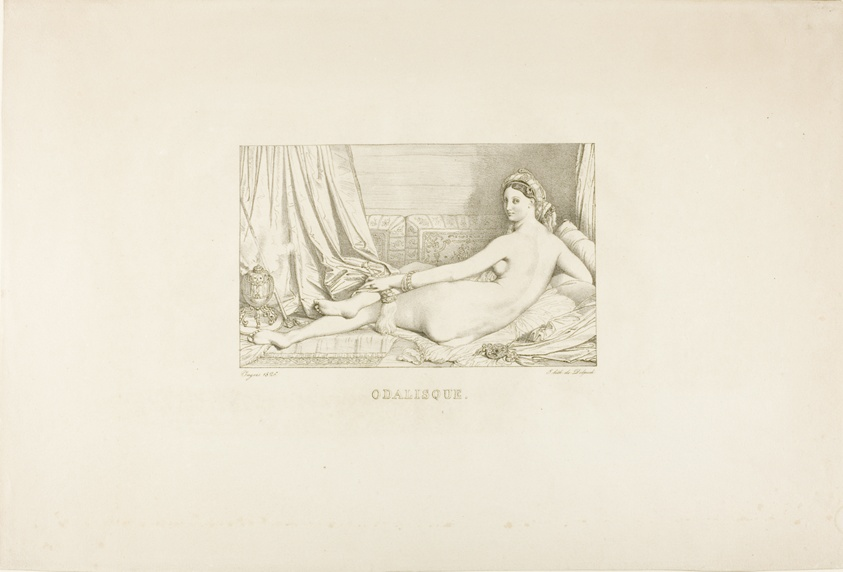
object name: Print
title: Odalisque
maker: François Delpech (French, 1778-1825); after Jean–Auguste–Dominique Ingres (French, 1780–1867)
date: 1825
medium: Lithograph on paper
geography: France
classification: lithograph; print; prints and drawing